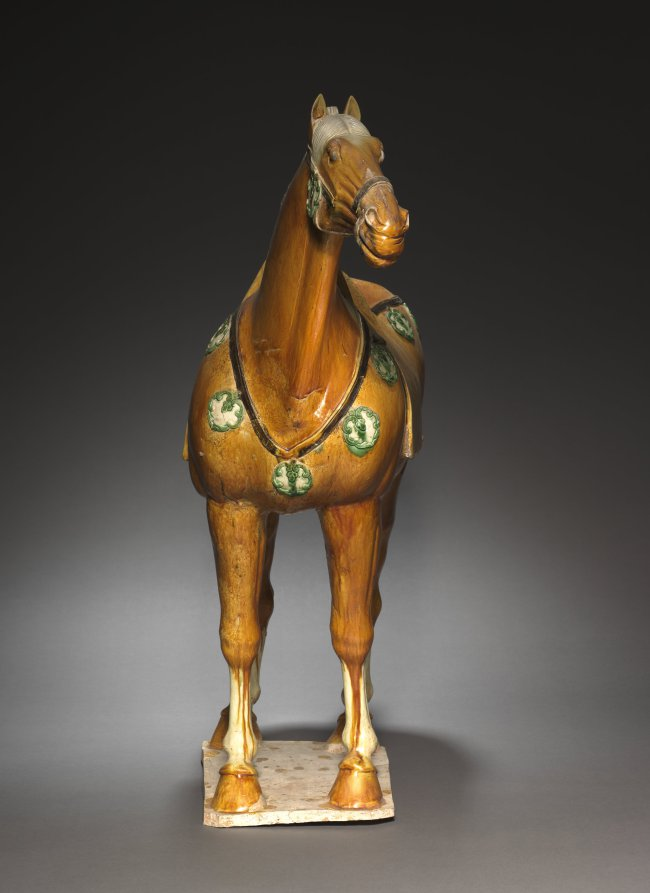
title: Horse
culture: China, probably Henan province, Tang dynasty (618–907)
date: late 600s–800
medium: glazed earthenware, sancai (three-color) ware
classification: Sculpture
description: This ceramic horse was part of a set of figures depicting a procession, all of which was included in the tomb of a person of high rank. In ancient China tombs were equipped with all the items it was thought to be needed in the afterlife—including horses, as an essential mode of transportation.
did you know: Sancai (three-color) glazes in green, amber, and transparent white show the high social status of the tomb’s occupant.